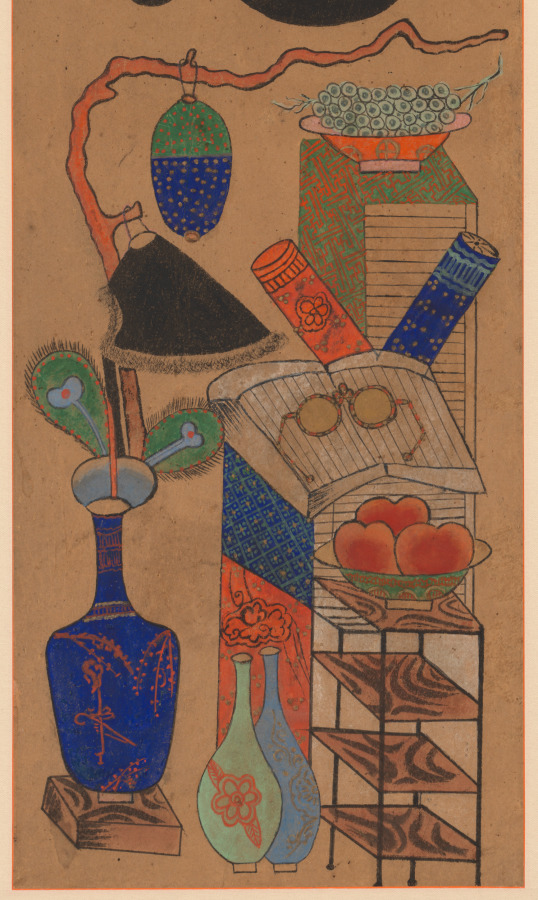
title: Munja-Chaekgeori Screen (Character-Books Screen)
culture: Korea, Joseon dynasty (1392–1910)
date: early 1900s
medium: Eight-panel folding screen, ink on paper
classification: Painting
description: This folding screen is a whimsical harmony of two different subjects: chaekgeori, or books and things; and munja, or characters. The lower section of each panel depicts the imagery of things, including books, decorative arts, and utilitarian objects. The upper portion of each panel bears a classical Chinese character. Read from far right to left, the eight characters refer to the values of Confucian teachings of the Joseon dynasty: filial piety, brotherly love, loyalty, trust, propriety, righteousness, modesty, and humility. While these two pictorial genres are harmoniously conjoined on the same picture plane, two sharply contrasting world views—urban consumerism and traditional Confucian ethics that despise materialism—compete with one another.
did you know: The eight Korean characters each mean filial piety, brotherly love, loyalty, trust, propriety, righteousness or justice, modesty or integrity, and humility or the feeling of shame.